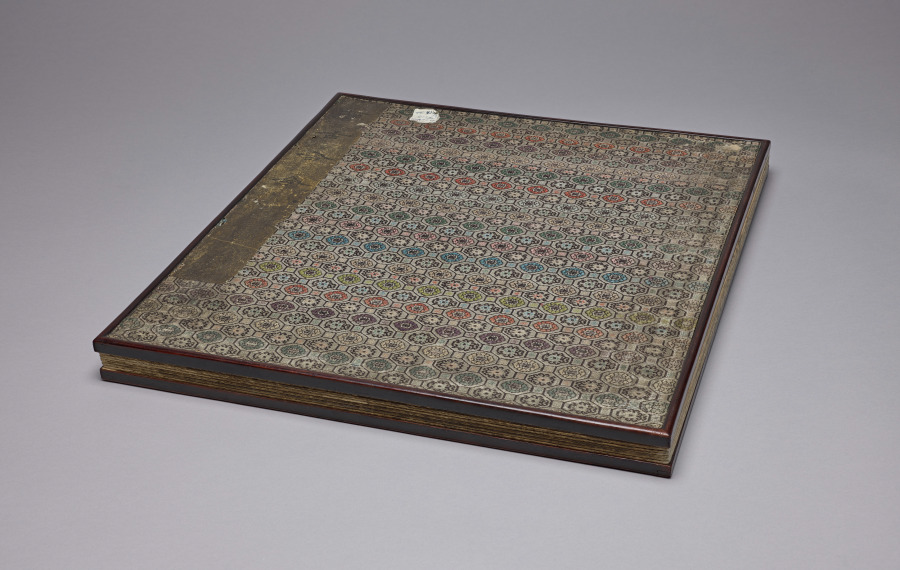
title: Absorb the Past; Abandon the Present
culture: China, Qing dynasty (1644–1911)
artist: style of Qian Hui'an (Chinese, 1833–1911)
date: 1800s–1900s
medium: Accordion-style album of 10 painted leaves; ink and color on silk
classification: Painting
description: Qian Huian, active in Shanghai, was best known for his paintings of beautiful women, and historic and mythological figures, rendered in a distinct style. His figures appear eccentric and the color palette pale to pink. The album’s title, Absorb the Past, Abandon the Present, reflect the desire to find refuge in China’s Past, as the country was going through the devastating Taiping rebellion at the time the paintings were created.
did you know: Leaf four depicts Tao Yuanming, carried by servants in a basket as he had an ailing foot. Tao wrote the Peach Blossom Spring tale, in which a fisherman loses his way and ends up in a utopia.